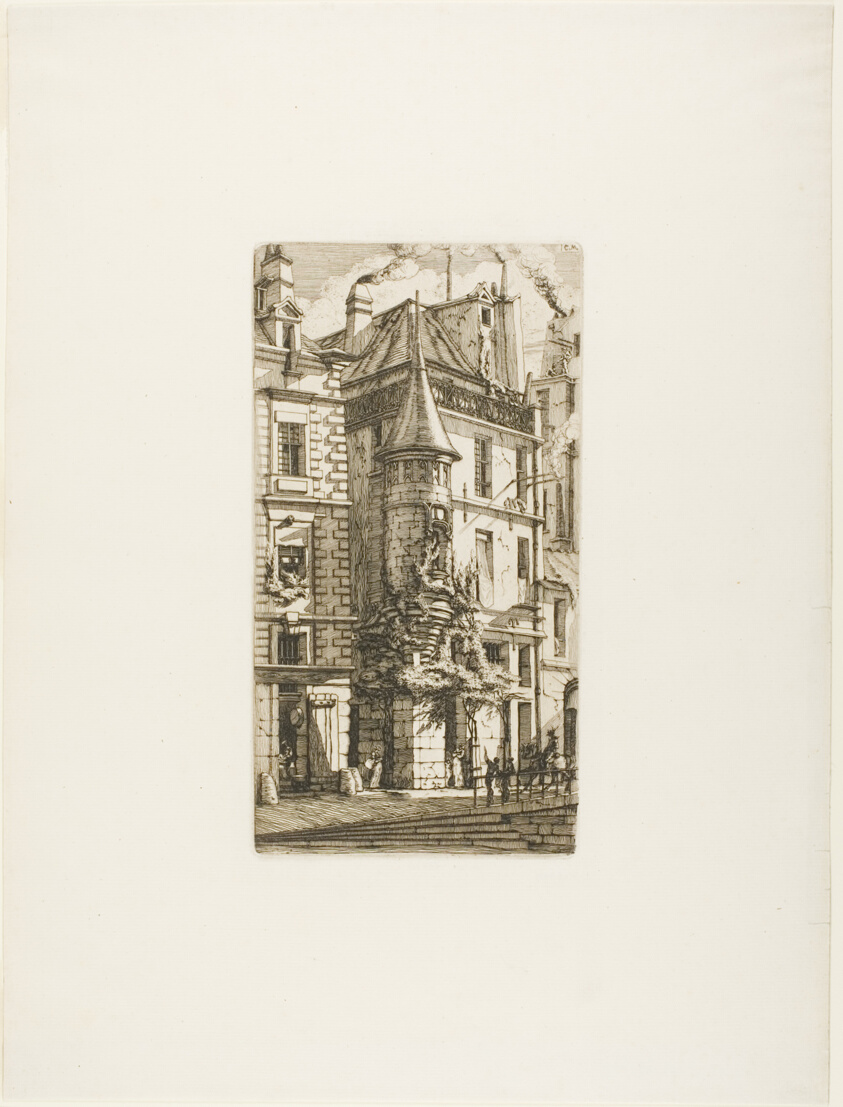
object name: Print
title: House with a Turret, rue de la Tixéranderie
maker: Charles Meryon (French, 1821-1868)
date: 1852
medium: Etching on ivory laid paper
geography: France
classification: etching; print; prints and drawing